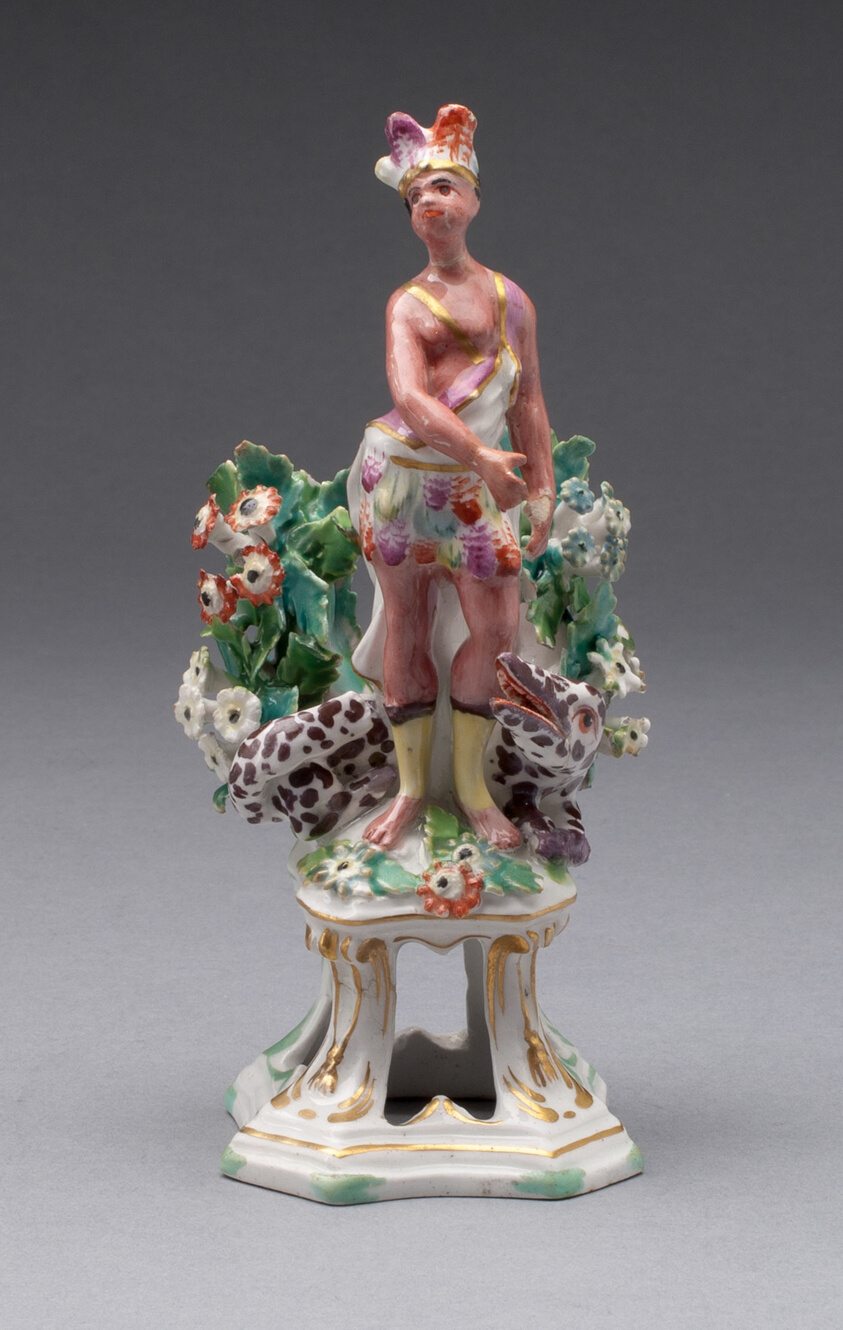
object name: Ceramics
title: Figure of America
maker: Bow Porcelain Factory (London, England, 1744-1775)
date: c. 1766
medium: Soft-paste porcelain, polychrome enamels and gilding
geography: Bow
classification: porcelain; european decorative arts; ceramics